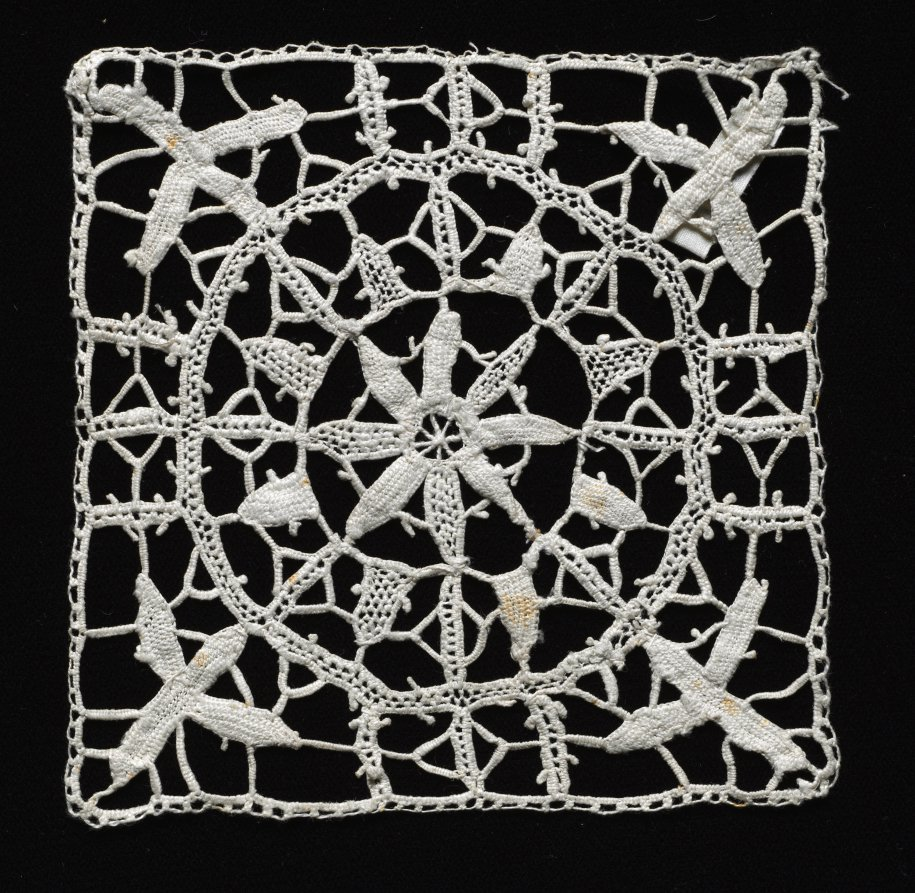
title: Lace Square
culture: Italy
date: 1500s–1600s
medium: Linen: needle lace (reticella)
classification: Lace